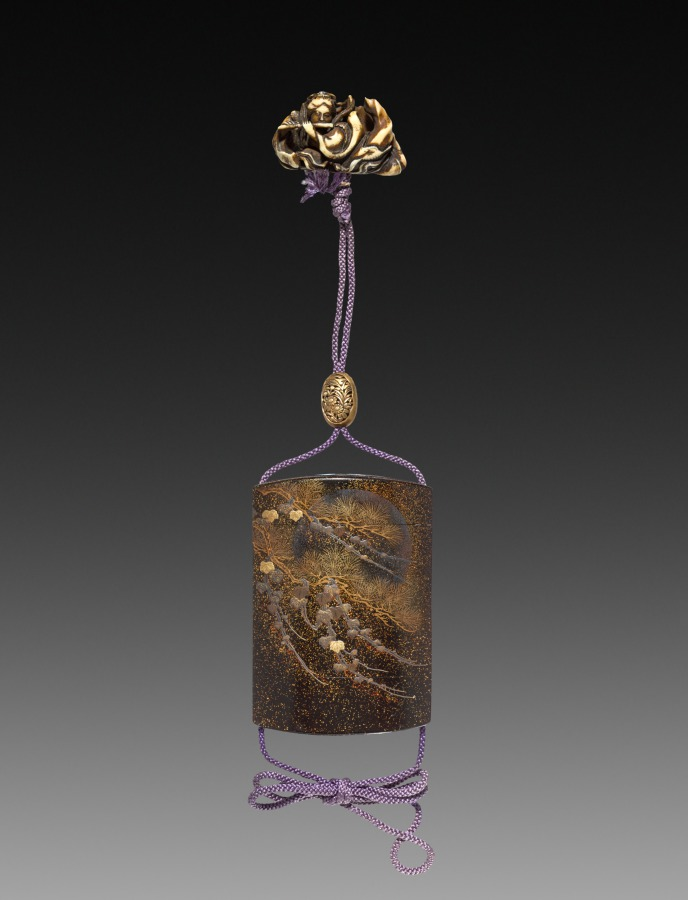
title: Inro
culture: Japan, Edo period (1615–1868)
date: 1615–1868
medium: lacquer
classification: Lacquer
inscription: Signature: Koma Kyuhaku